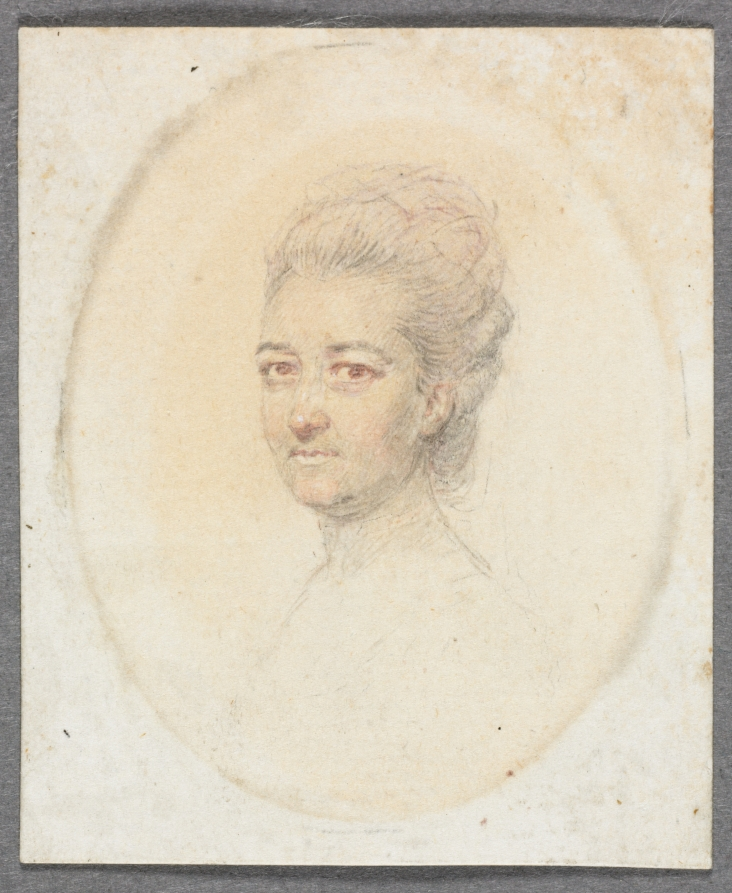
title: Portrait of a Woman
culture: England, 18th century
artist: John I Smart (British, 1741–1811)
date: c. 1775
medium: graphite and wash on laid paper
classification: Portrait Miniature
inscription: inscribed on paper backing in graphite, upside down, at upper right: 139; also on paper backing in graphite on slant at lower right corner: La belle/Gabrielle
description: Although it is impossible to say if it was always part of the artist’s process to execute a preparatory sketch prior to painting each miniature, we do know that John Smart retained many hundreds of these sketches. A group of preparatory sketches—of which this portrait is one—descended through the Smirke family after Smart’s daughter Sarah gave a sketchbook containing preparatory portrait studies to her friend Mary Smirke, sister of the celebrated Victorian architect Sydney Smirke. This book was probably broken up around 1877 when it was divided between Sydney’s daughters Mary Jemmett and Mrs. Lange, whose portions were both sold at auction in 1928. This portrait was assigned the historically colorful but fictitious title of “La Belle Gabrielle” at some point after memory of its true identity had been lost. Giving illustrious titles to portraits of unknown sitters was a popular strategy adopted by dealers during the nineteenth and twentieth centuries, often applied to miniature portraits and, in particular, to Smart’s sketches of women. The inscription on the paper backing is not in Smart’s hand, and when the paper backing was removed in 1993, no inscriptions were discovered on the back of the drawing itself. Only the sitter’s head and neck are drawn, and a low-necked dress is faintly suggested. Her head is turned to the right, and her light-colored hair is dressed high, with flat curls against the back of her head. She has brown eyes, and the color of her lips is extremely faded, though the hint of a ruddy complexion remains. Her sagging jaw line and the lines beneath her eyes suggest that this sitter was painted as a mature woman. The background is unpainted. To this date, the finished ivory for which this preparatory sketch was presumably undertaken has not been discovered.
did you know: Sketches helped John Smart work out the particulars of a portrait before commencing the miniature on ivory; they were useful in the event that a duplicate might later be required.